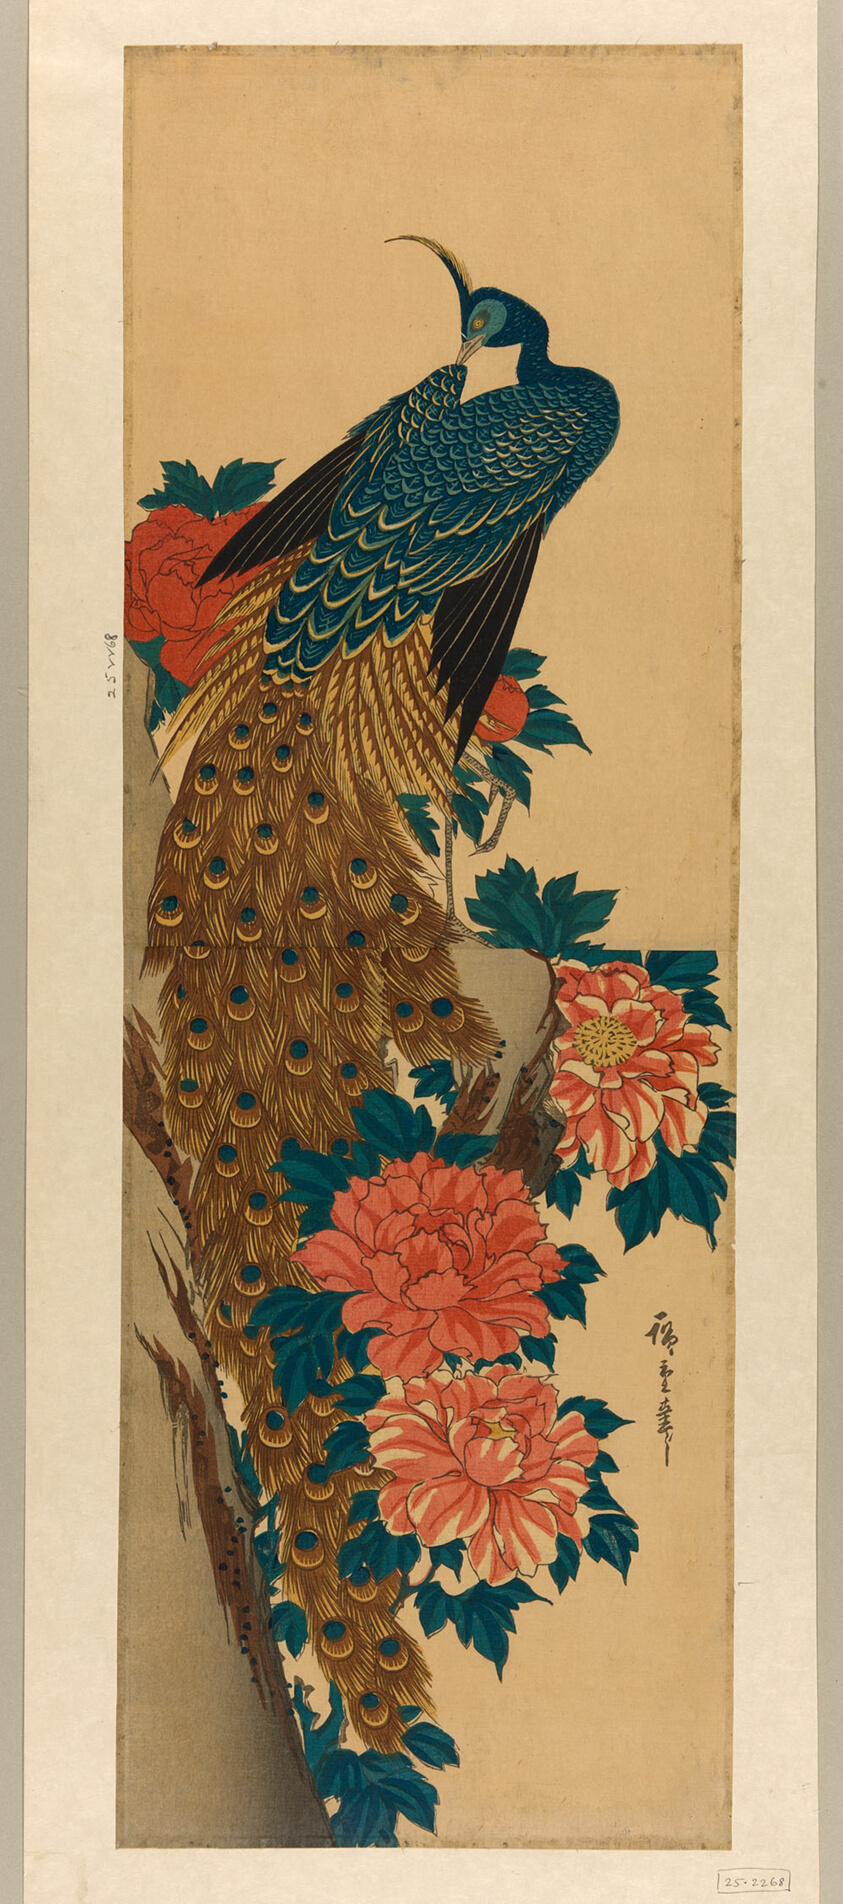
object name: Print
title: Peacock and peonies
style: Japanese (culture or style)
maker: Utagawa Hiroshige 歌川 広重; Japanese, 1797-1858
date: early 1840s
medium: Color woodblock print; vertical oban diptych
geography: Japan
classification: woodblock print; print; asian art